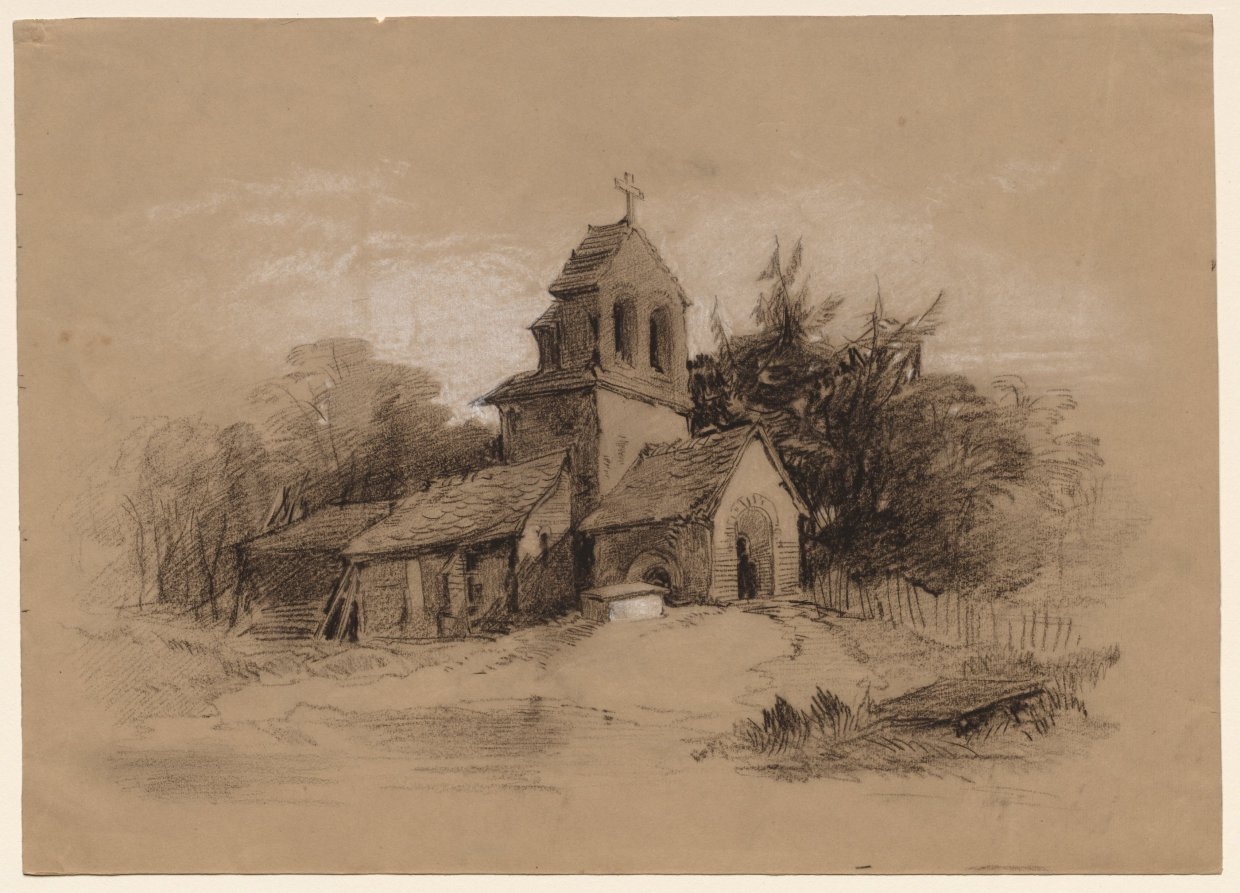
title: Church in a Landscape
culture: England, 19th century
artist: Henry Bright (British, 1810–1873)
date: 1800s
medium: charcoal and white chalk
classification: Drawing